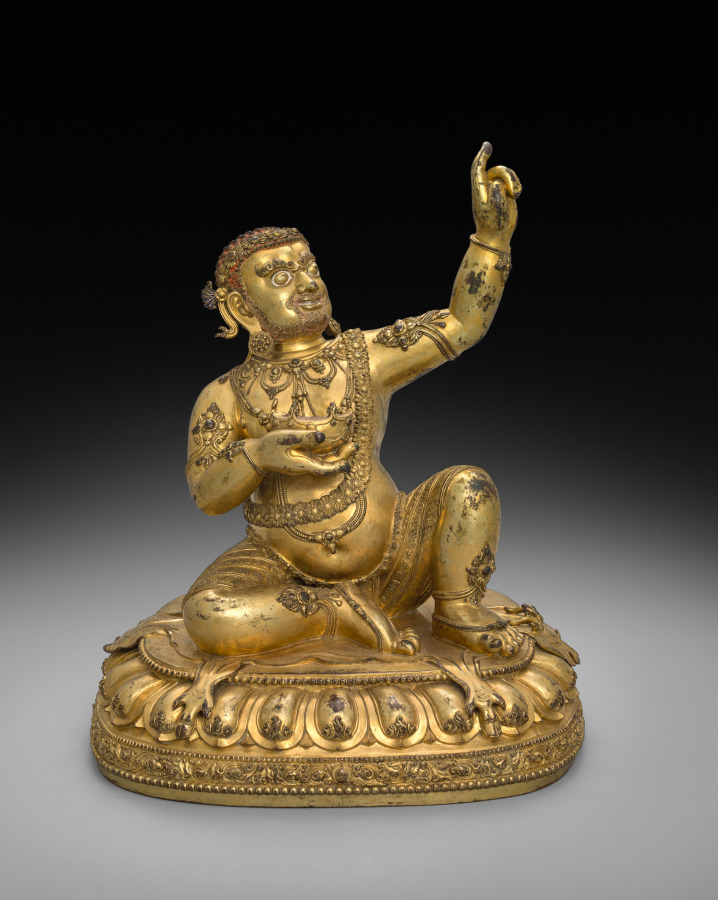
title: Virupa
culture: China, Ming dynasty (1368-1644), Yongle reign (1403-1424)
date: early 1400s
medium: Gilt bronze with silver, stones, and pigment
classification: Sculpture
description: Virupa is one of the great teachers in the history of tantric Buddhism. His posture references his ability to stop the sun; as an enlightened being, he can control phenomena of nature. As a tantric practitioner, he overturns ordinary assumptions about proper behavior, so he overeats, drinks large quantities of liquor, and waits for the king to pay his bill at the tavern. At the edge of the lotus pedestal is an inscription identifying the image as having been made in the imperial kilns of the third emperor of the Ming dynasty in China as a gift to a Tibetan monastic leader. While closely linked to Tibetan styles, the luxurious detailing, special gilding process, and the casting of the ornaments onto the body without use of inlay are specifically Chinese characteristics.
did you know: Virupa's clothing and jewelry are embellished with silver and stones, while pigments enhance his hair and eyes.